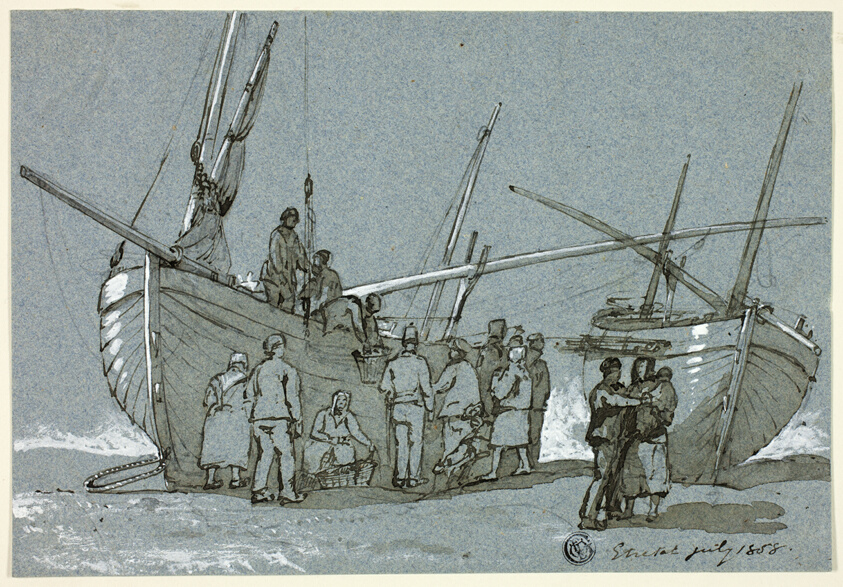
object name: Drawing and Watercolor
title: Entretat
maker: Attributed to Clarkson Stanfield; English, 1793-1867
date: July, 1858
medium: Pen and brown ink, with brush and brown wash and white gouache, over traces of graphite, on blue wove paper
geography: England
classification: pen and ink drawings; drawings (visual works); prints and drawing